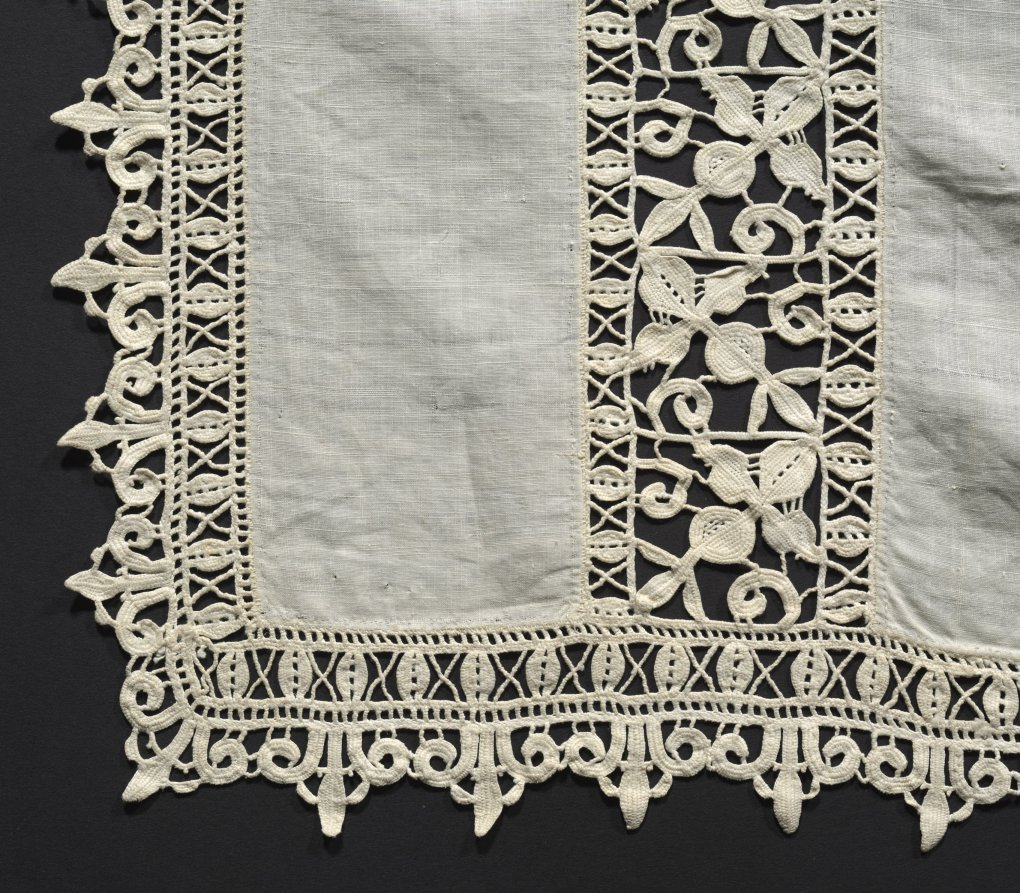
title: Cloth with Lace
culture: Italy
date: 1560–99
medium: Linen: needle lace (reticella and punto in aria)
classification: Lace